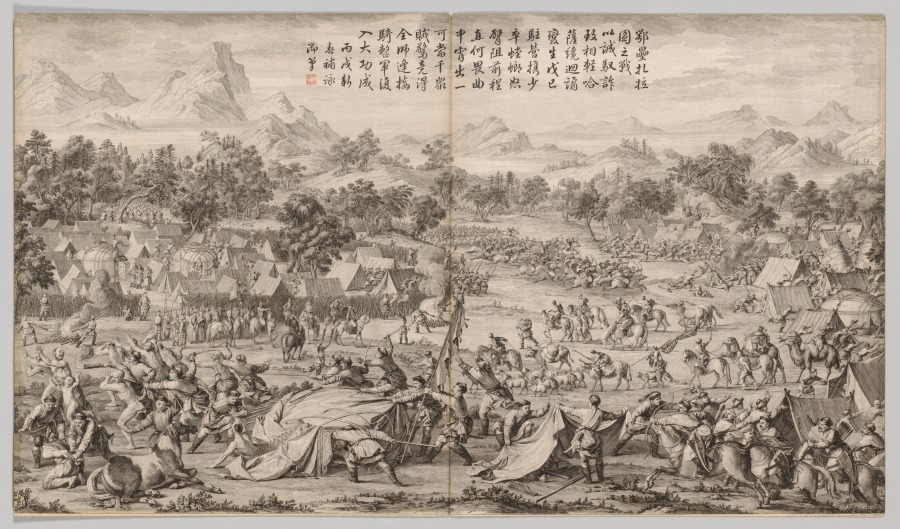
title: The Battle at Elei Zhalatu: from Battle Scenes of the Quelling of Rebellions in the Western Regions, with Imperial Poems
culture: China, Qing dynasty (1644–1911), Qianlong reign (1736–95)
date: c. 1765–74; poem dated 1766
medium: etching, mounted in album form, 16 leaves plus two additional leaves of inscriptions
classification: Print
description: This set of etchings was commissioned by Emperor Qianlong to record in pictorial terms the courage of his generals and soldiers in quelling the rebellions in China's western regions. Qianlong added his own poem to each of the etchings, indicating his appreciation and pride in this demonstration of military might. "Western Regions" refers to the present-day Xingjiang province, often described in Western writing as "Central Asia."